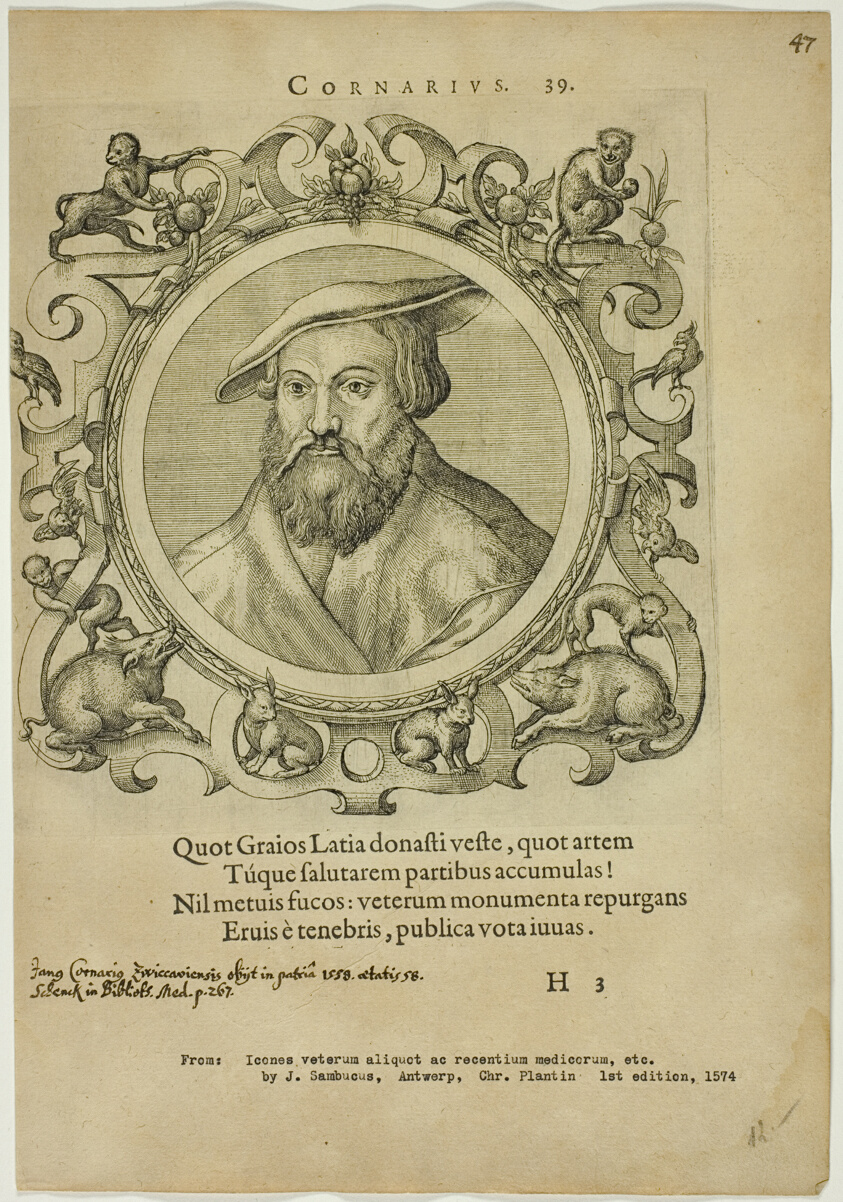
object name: Print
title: Portrait of Cornarius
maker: Unknown Artist (Flemish); written by Johannes Sambucus (Flemish, 1531-1584)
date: published 1574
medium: Etching, with engraving, on cream laid paper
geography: Flanders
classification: etching; print; prints and drawing